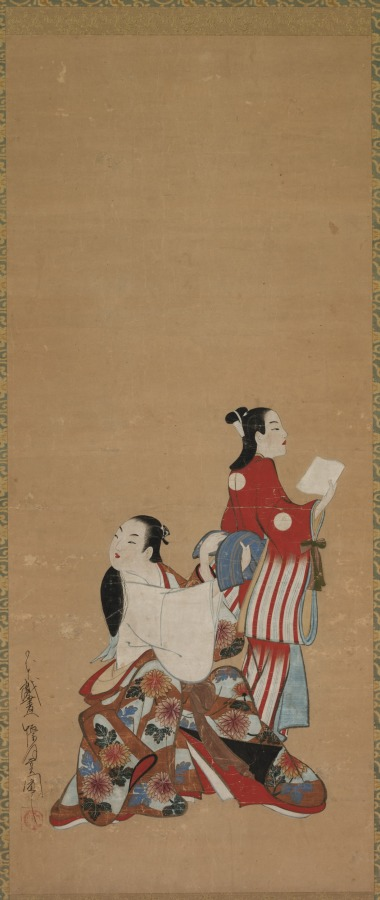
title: Courtesan and Attendant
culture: Japan, Edo period (1615–1868)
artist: after Kaigetsudō Ando (Japanese, c. 1671–1743)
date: c. 1730–1868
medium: hanging scroll: ink and color on paper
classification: Painting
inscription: signed: Nihon giga Kaigetsudō no zu